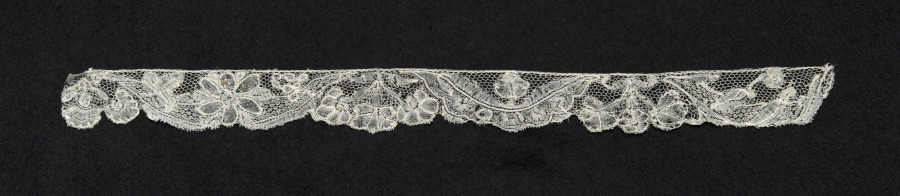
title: Lace Edging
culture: Belgium, Brussels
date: 1740–60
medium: Bobbin lace (Point d'Angleterre)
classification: Lace